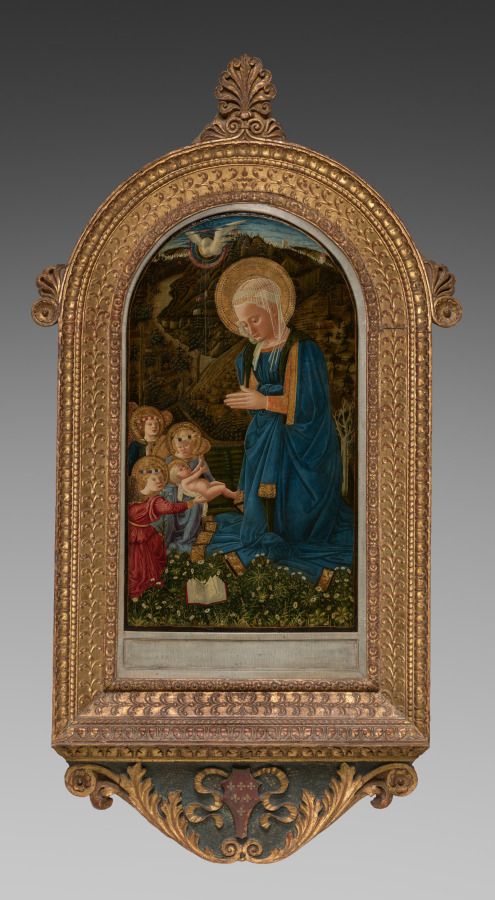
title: Virgin and Child with Angels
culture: Italy, Florence, 15th century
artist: follower of Fra Filippo Lippi (Italian, c. 1406–1469)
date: c. 1460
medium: tempera and gold on wood panel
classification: Painting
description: This painting, produced by one of Fra Filippo Lippi’s many imitators in the city of Florence, is very close to the composition of the now lost central panel of the triptych commissioned by the Medici family in 1457. It was purchased by Mrs. L. E. Holden before the museum’s acquisition of the two flanking panels of Saint Anthony Abbot and Saint Michael. It has been suggested that this painting is a copy of the original lost central panel of Fra Filippo’s triptych of 1457.